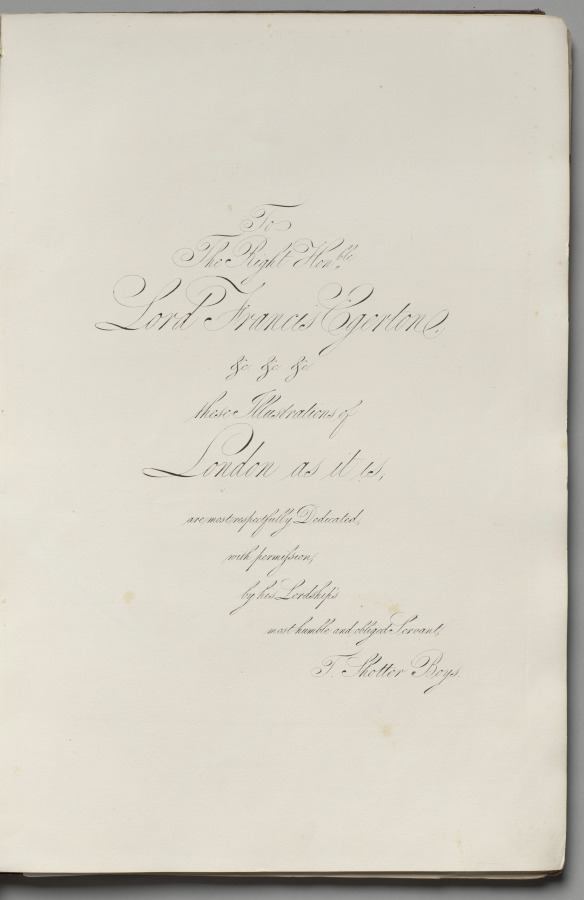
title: London As It Is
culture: England, 19th century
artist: Thomas Shotter Boys (British, 1803–1874)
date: 1842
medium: lithograph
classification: Bound Volume